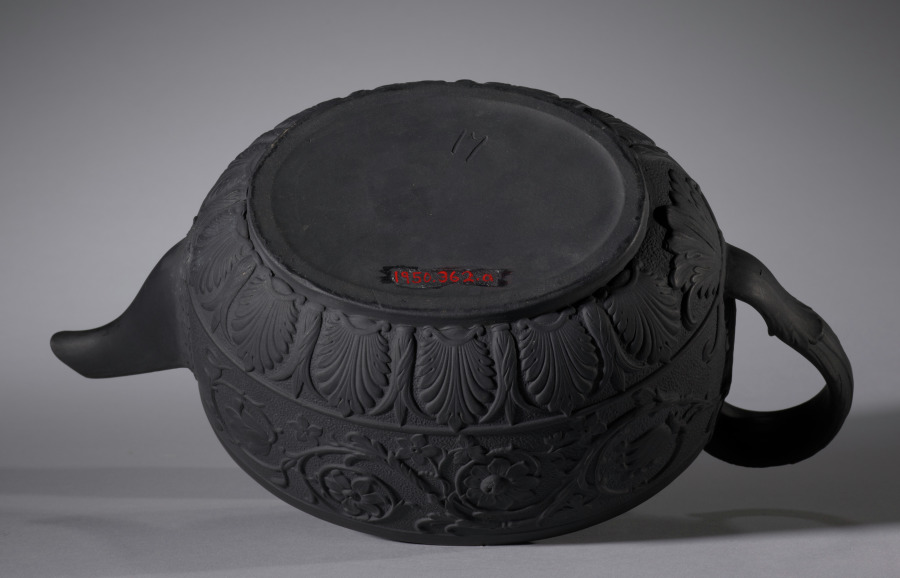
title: Teapot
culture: England, 19th century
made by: Elijah Mayer & Son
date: c. 1810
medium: black basalt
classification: Ceramic